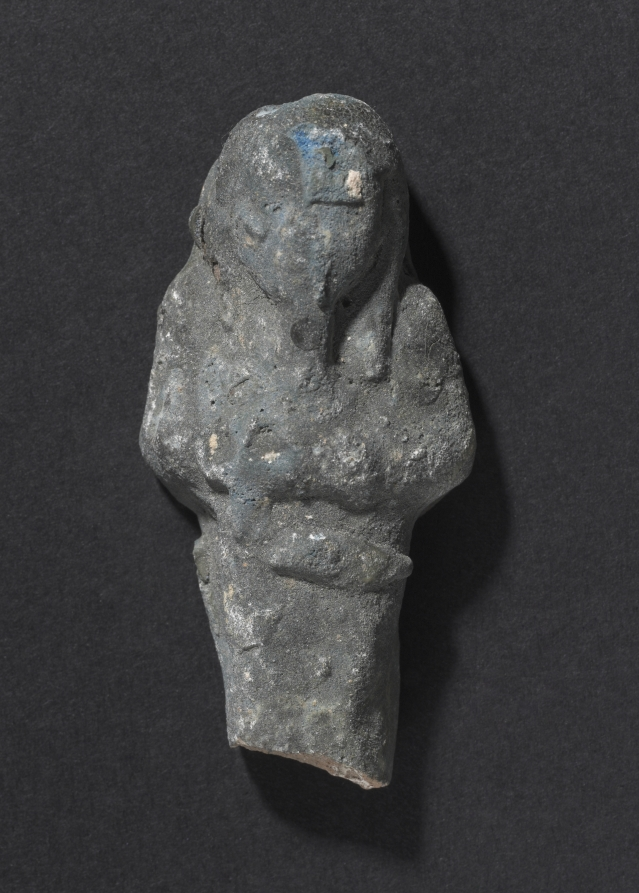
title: Shawabty of Ditamenpaankh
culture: Egypt, Late period (715–332 BCE), Dynasty 25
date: 715–656 BCE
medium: terracotta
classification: Funerary Equipment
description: High demand for shawabtys in the Late Period, a time when as many as 400 or more shawabtys were placed in the tomb with the deceased, gave rise to a specialized container for storing them: the shawabty box. This example is inscribed for the lady of the house, Ditamenpaankh, and was probably one of a pair originally made for her. The single-masted boat on the box's lid is perhaps an allusion to the pilgrimage of the deceased to the holy city of Abydos, the cult city of Osiris, king of the dead. The shawabtys inside are crude, mass-produced examples cast in an open mold. Made of terracotta, their blue paint imitates more costly shawabtys made of faience. As for the shawabty spell, it has been removed from its traditional location on the shawabty's front and relocated onto the sides of box, where it needed only to be written once, thus expediting production.